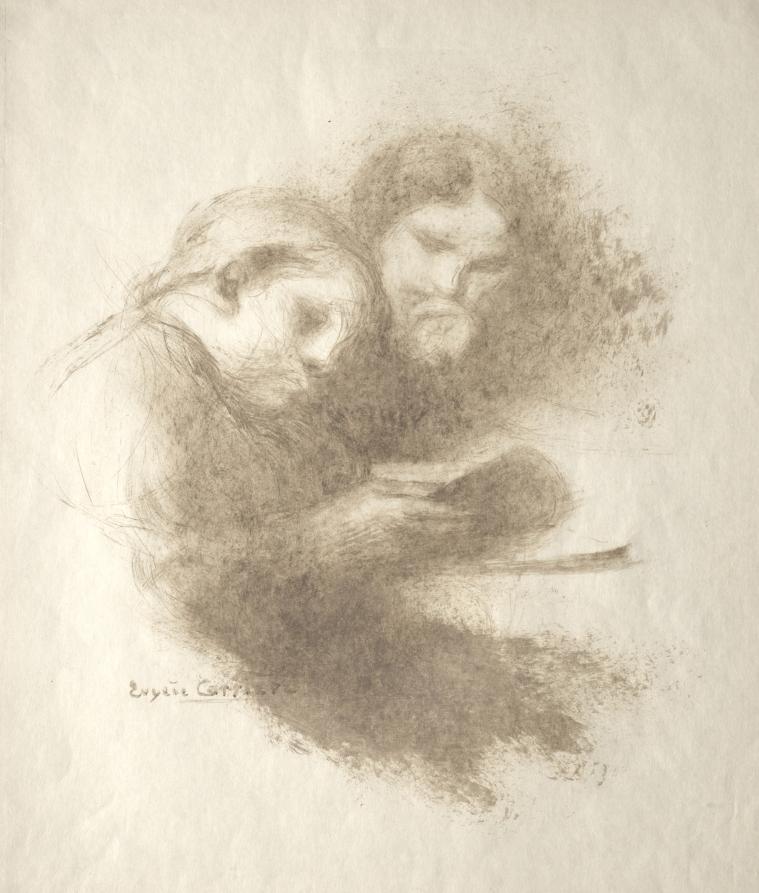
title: Reading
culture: France, 19th century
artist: Eugène Carrière (French, 1849–1906)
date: c. 1875–1900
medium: brush and brown ink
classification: Drawing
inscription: Signed, lower left, in brown ink: Eugène Carrière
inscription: verso, center right, in graphite: Dessin original / d' Eugène Carrière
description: Eugène Carrière was known for the evocative, hazy brushwork he used throughout various media. Executed in his signature style, this drawing likely depicts the artist's family studying a book together. Carrière favored such intimate domestic scenes, using ethereal ochre marks to allow his subjects to blend into their surroundings.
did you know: Eugène Carrière's close friend, the sculptor Auguste Rodin, once said of the artist that he "sculpts in shadow."